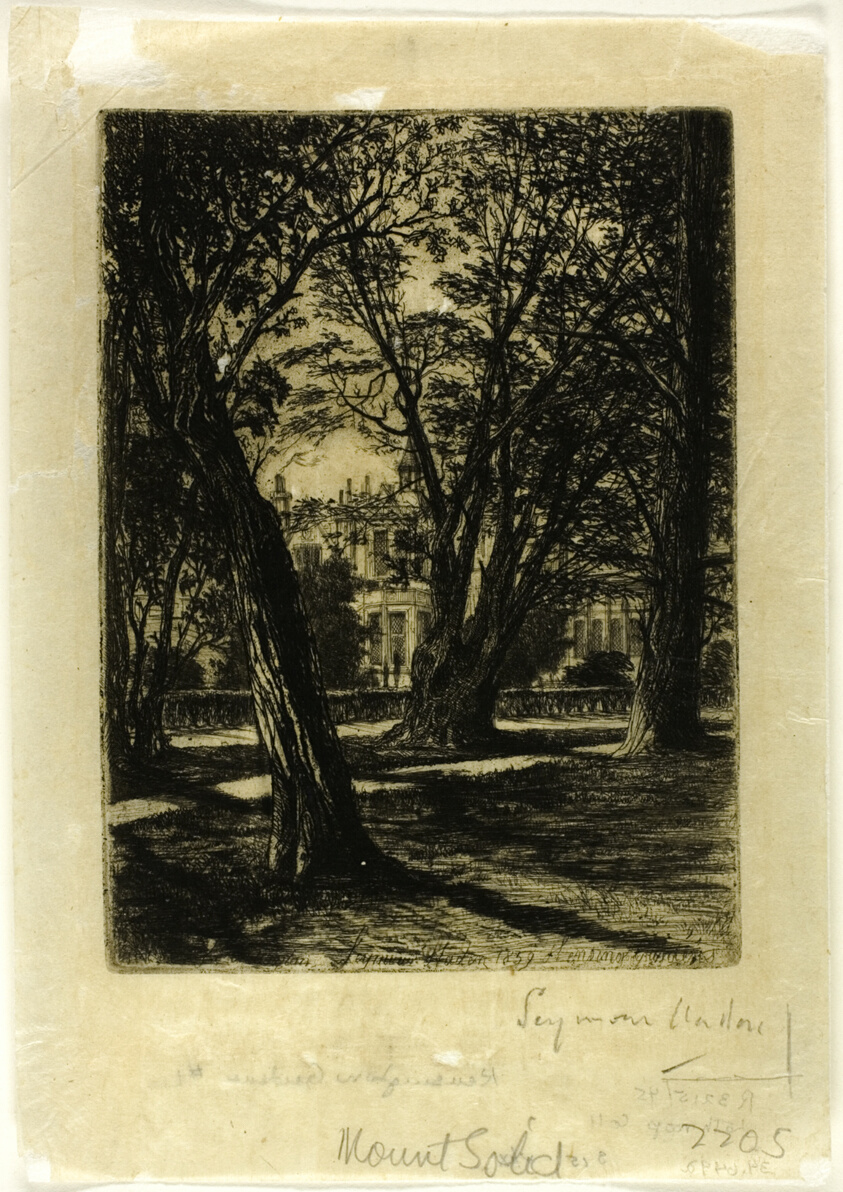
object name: Print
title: Kensington Gardens, No. I (small plate)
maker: Francis Seymour Haden (English, 1818-1910)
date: 1859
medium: Etching and drypoint on ivory Japanese paper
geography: England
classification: etching; print; prints and drawing